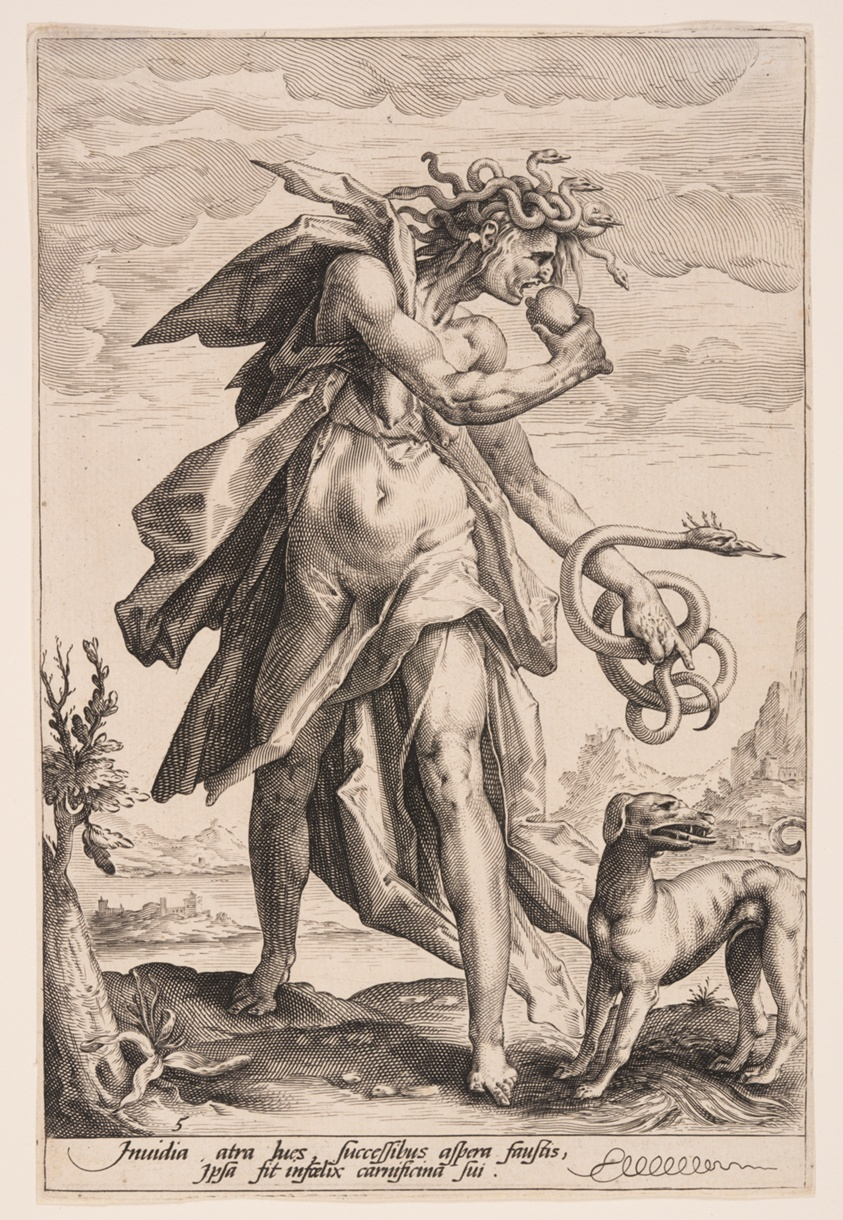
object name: Print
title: Envy, plate 5 from The Vices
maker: Jacob Matham (Dutch, 1571–1631); after Hendrick Goltzius (Dutch, 1558–1617)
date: c. 1587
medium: Engraving on laid paper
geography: Netherlands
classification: print; engraving; paper; prints and drawing